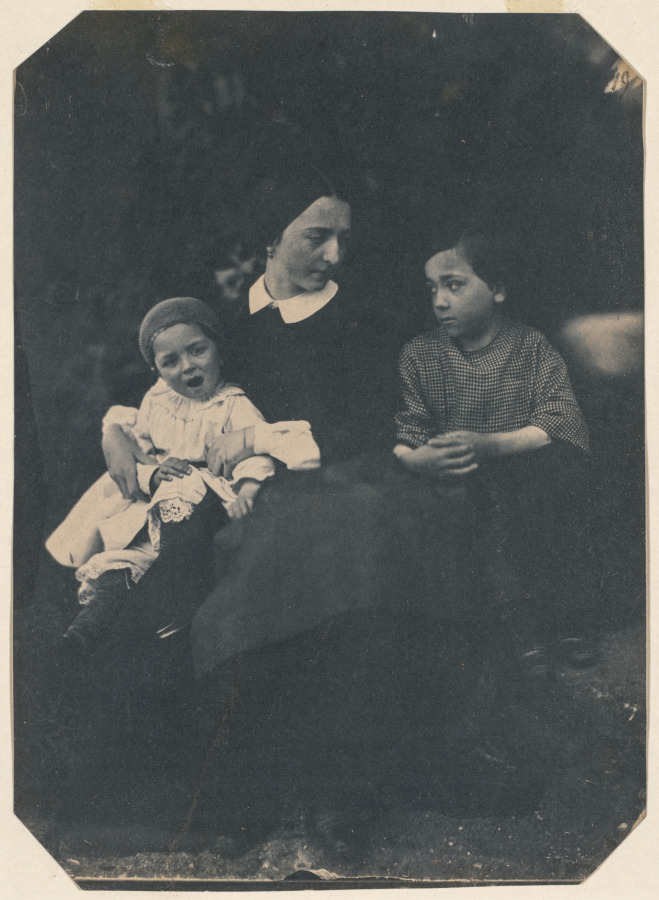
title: Mother with Two Children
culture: France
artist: Jean-Baptist Frénet (French, 1814–1889)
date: c. 1855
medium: salted paper print from a collodion negative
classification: Photograph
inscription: written in black on recto: "19"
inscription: written in pencil on verso: "50/2 [upside down]"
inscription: written in black on verso: "4"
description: After anti-government political activity closed off his professional opportunities as a painter, Jean-Baptiste Frénet took up photography in 1850 and a decade later opened a commercial portrait studio. He preferred simple, plain settings and relied on sitters’ interactions to reveal their personalities and relationships. This family grouping, probably taken for personal pleasure, offers a sense of casual immediacy unusual for the time in both painted and photographic portraiture.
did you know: Frénet was one of the earliest photographers to take spontaneous, rather rigidly formal, portraits.